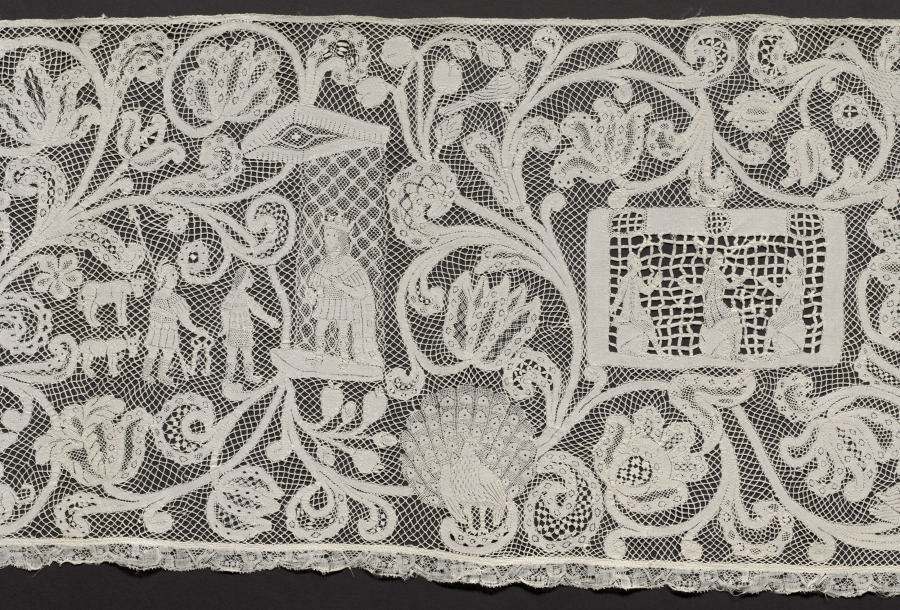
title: Lace Flounce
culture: Italy, Milan(?)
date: 1750–99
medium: Linen: bobbin lace (Punto di Milano)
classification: Lace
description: Being the most prestigious material, lace was used extensively by the 1600s for altar linen and for trimming priest’s albs, often incorporating finely rendered religious images amid blossoming vines. This alb flounce depicts scenes from the Old Testament story of Joseph, whose jealous brothers sold him to a caravan bound for Egypt. Joseph later interpreted dreams of the pharaoh, who made him ruler. When famine in Canaan caused Joseph’s ten brothers to travel to Egypt in search of food, they bowed down to him. After he revealed his identity, he forgave his brothers and God saved the family.